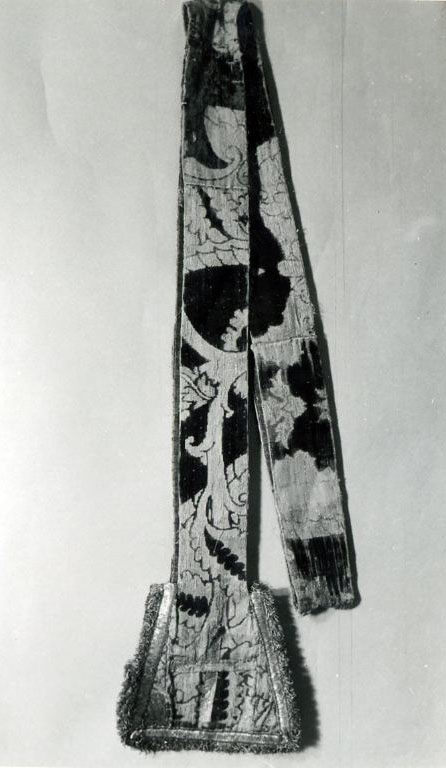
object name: Textile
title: Stole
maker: Spain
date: 15th century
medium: Silk, velvet; cut, voided; additional brocading wefts in gilt strip (wound around silk fiber core) forming loops where required; gilt galloon trim and crosses; two attached silk cords, knotted and fringed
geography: Spain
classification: textile; weaving - velvet; costume; dress (garment); clothing